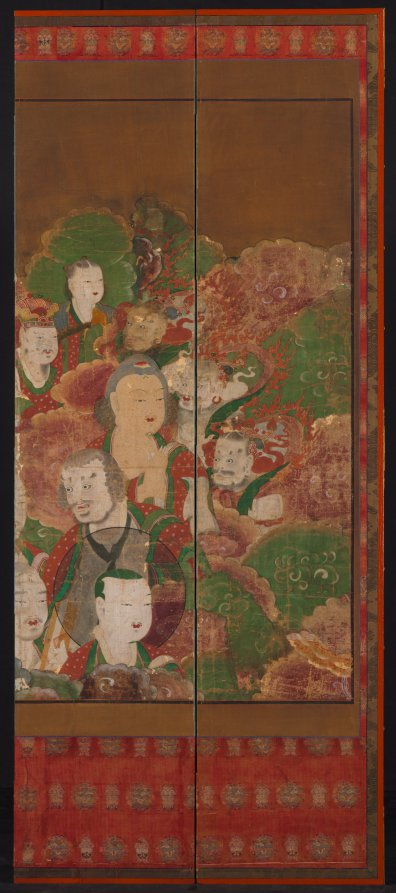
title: Buddhist Deities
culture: Korea, Joseon dynasty (1392–1910)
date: 1700s–1800s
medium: Four-panel folding screen; ink and color on silk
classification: Painting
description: This painting is a fragment of a much larger banner painting, now preserved by mounting on a four-panel continuous folding screen. On the back are Buddhist sutra pages, with text written in gold ink on indigo dyed paper.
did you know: This painting is a fragment of a much larger banner painting.